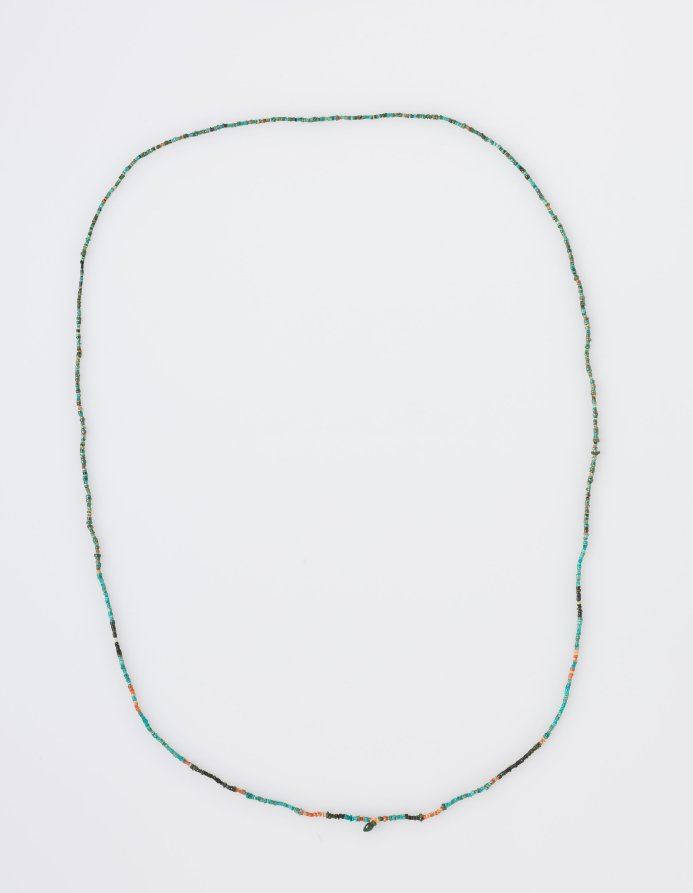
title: Necklace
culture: Peru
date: before 1532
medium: polished stone beads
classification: Jewelry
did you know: These ancient beads were restrung in modern times.